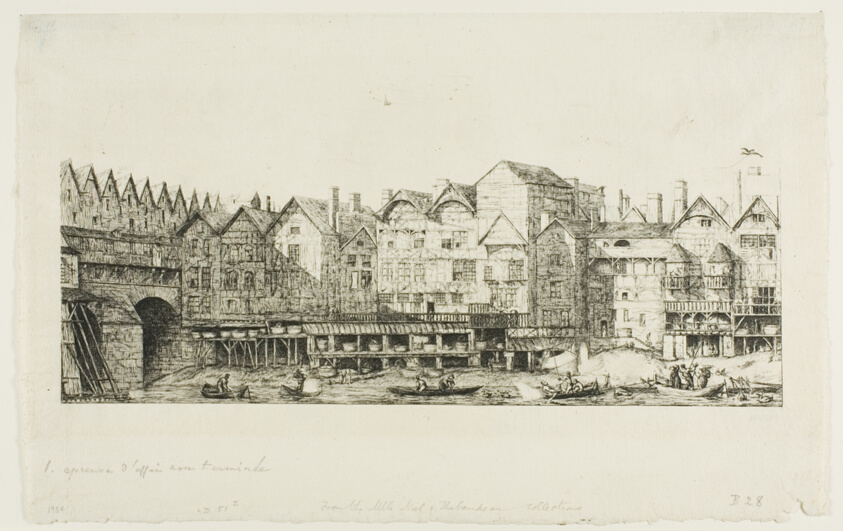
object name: Print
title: View of Part of the City of Paris toward the Close of the XVII Century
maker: Charles Meryon (French, 1821-1868)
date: 1861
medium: Etching on ivory laid paper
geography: France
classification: etching; print; prints and drawing